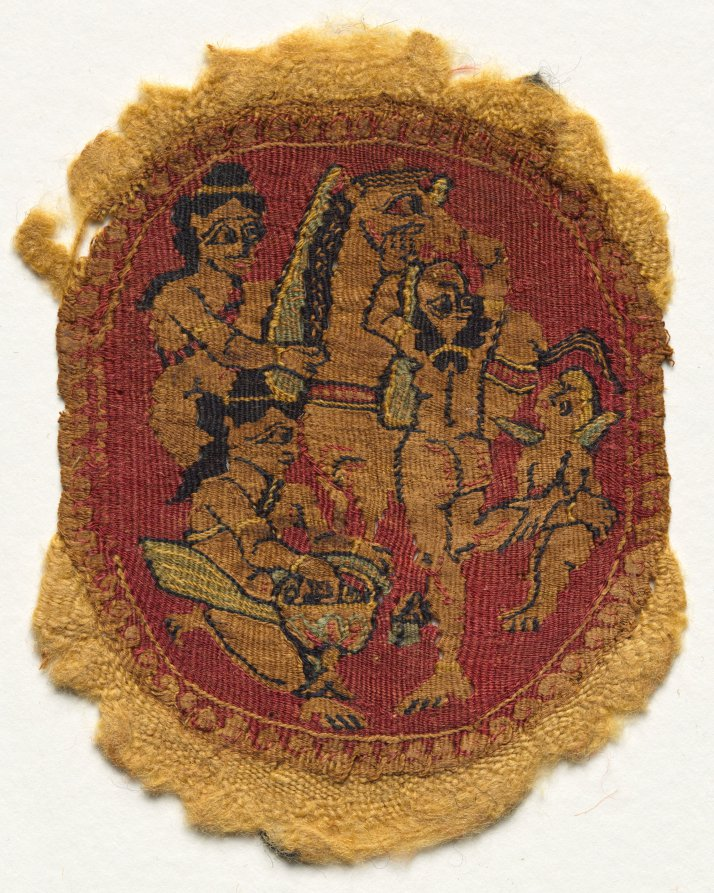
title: Five Round Segmenta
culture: Egypt, Umayyad period (661–750)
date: 650 – 750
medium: tapestry weave: wool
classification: Textile